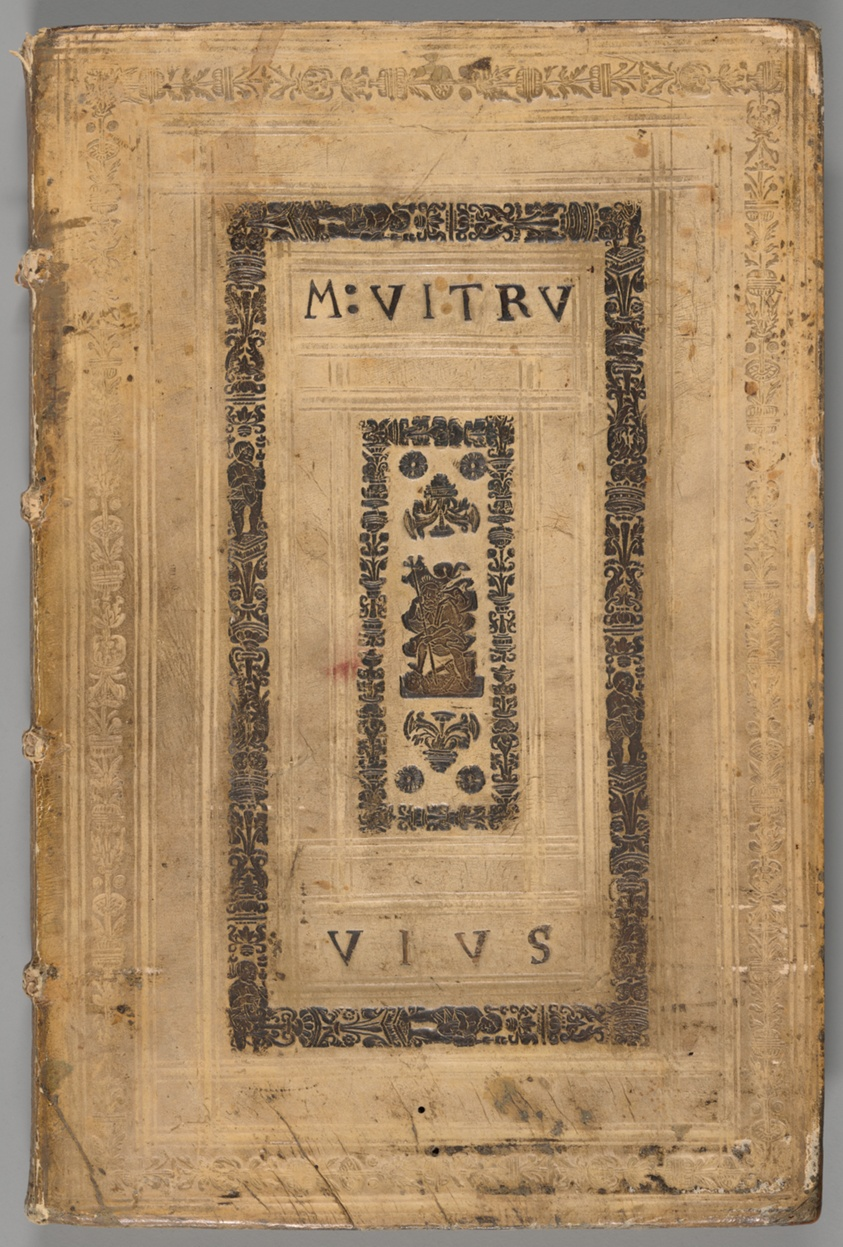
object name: Book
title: De Architectura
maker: Marcus Vitruvius Pollio (Roman, active first century BCE)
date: Venice, Italy: Ioannis de Tridino, also known as Tacuino, 1511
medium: Letterpress and woodcut in black on ivory laid paper; four-piece decorative woodcut title border with scrolling foliage and dolphin motifs; full alum-tawed ornamental leather binding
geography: Italy